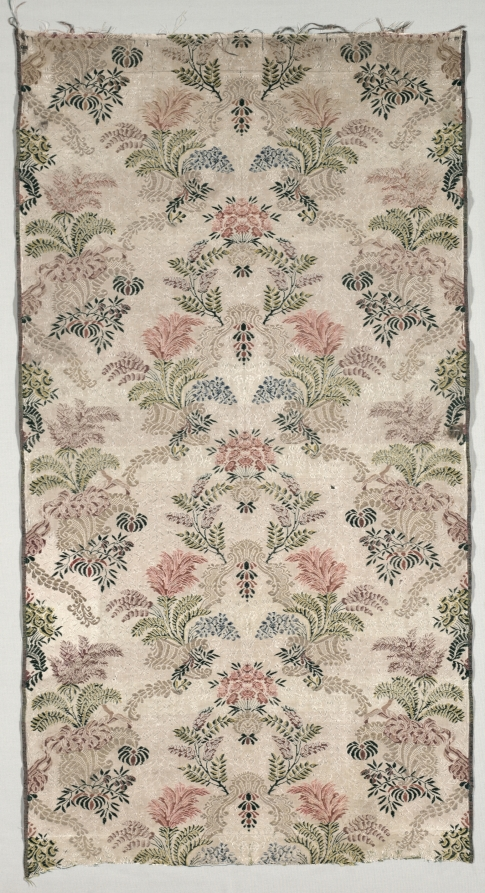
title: Length of Silk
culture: Italy, 18th century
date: 1700s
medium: damask, brocaded; silk and metal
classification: Textile